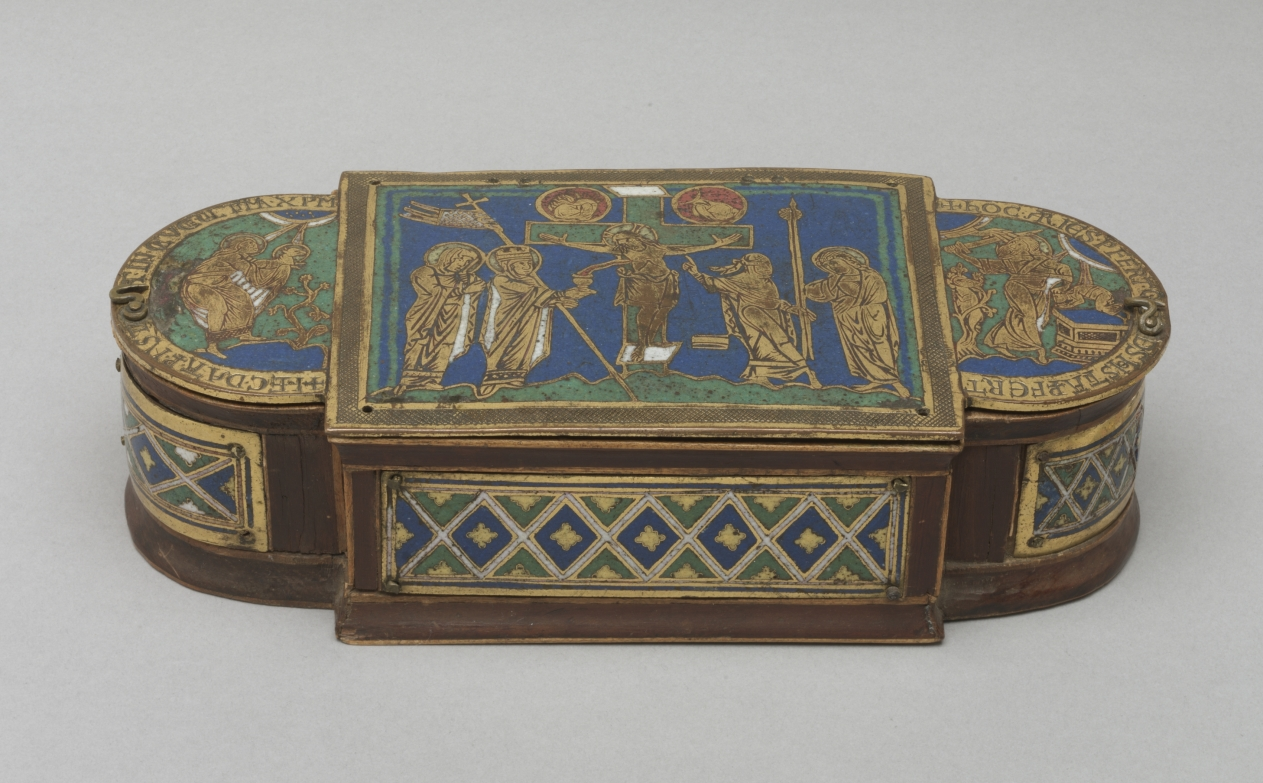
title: Pyx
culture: Germany, Lower Saxony, Hildesheim?, Romanesque period, enamels: 12th century; wood core: 19th century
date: c. 1170–1180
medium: gilded copper, champlevé and cloisonné enamel, wood core (modern)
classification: Enamel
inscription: + H[A]EC DATA P[ER] IVSTV[M] […]AT IN CRVCE VICTIMA CHR[ISTV]M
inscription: + HOC ARIES P(RE)FERT Q[VO]D […] D[EV]S HOSTIA P[ER]FERT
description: The image of Christ’s crucifixion dominates this enameled box. Personifications of the Christian church, the Jewish faith, and the Virgin and Saint John flank the cross. Two Old Testament scenes--Abel’s sacrifice of sheep and Abraham’s sacrifice of Isaac--appear on either side. The box once served as a pyx, a container for the consecrated host, itself a symbol of Christ’s sacrifice.